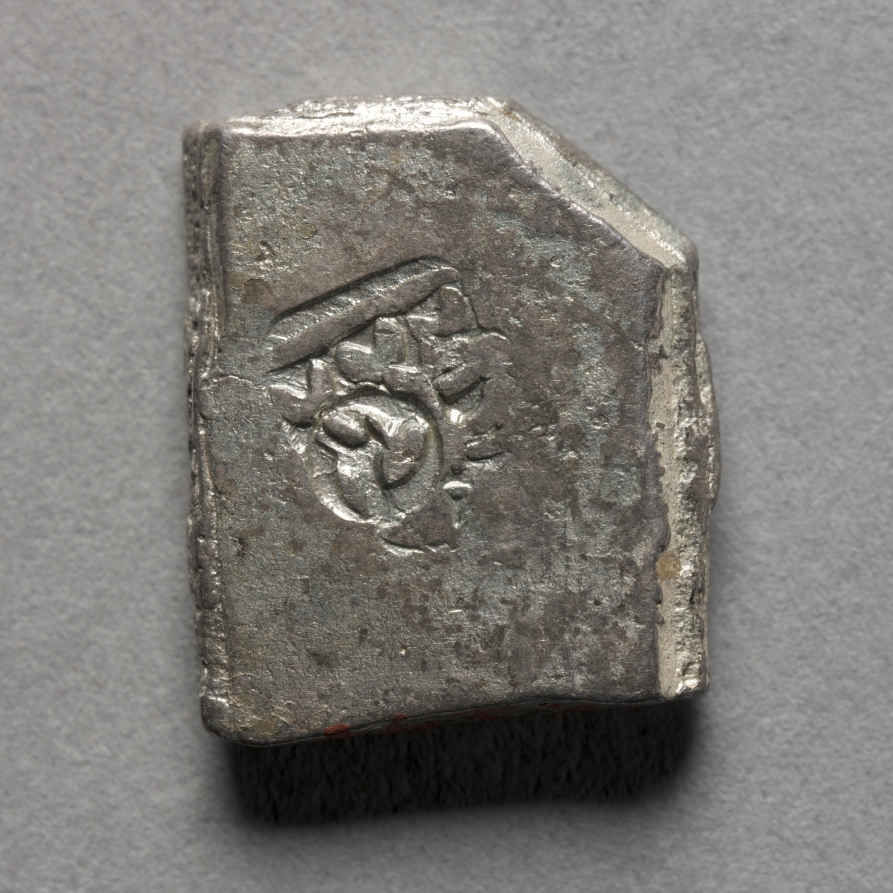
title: Punch-Marked Coin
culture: India, Rajasthan, Maurya period (322–185 BCE)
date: 400–300 BCE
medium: silver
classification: Coins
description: After Alexander of Macedon succeeded in conquering Egypt and Persia in 331 BC, his ambition to rule the known world led him further east across Bactria in Afghanistan, through the Hindu Kush mountain pass, and into India. There he succeeded in defeating all the local kings of the region until his men, on the brink of mutiny, insisted that they return to Greece. Alexander left governors in charge of his territories, and after his death in 323 BC, his governors became independent kings, establishing Hellenistic cities and a Greek cultural base in the region, which lasted for almost 200 years. Native Indian coinage was marked with symbols associated with the place where they were issued.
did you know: Early Indian coins were cut in irregular shapes and punched with a wide range of marks. The deep punches would prove that the coin was pure silver all the way through.